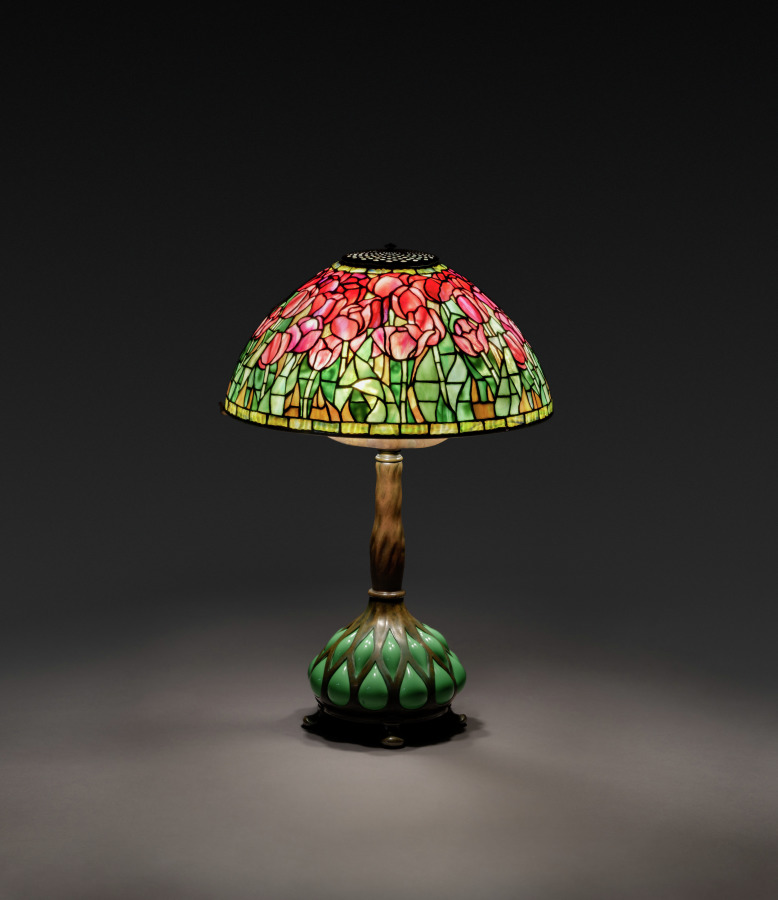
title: Tulip Table Lamp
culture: America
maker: Tiffany Glass & Decorating Company (America, New York, 1892–1902)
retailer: Tiffany Studios (United States, New York, 1902–32)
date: c. 1900–1906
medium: Leaded glass, blown glass, bronze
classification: Lamp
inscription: Shade impressed: TIFFANY STUDIOS NEW YORK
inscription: Base impressed: TGDCo/TIFFANY STUDIOS/NEW YORK/21667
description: In the 1870s a renewed emphasis on natural landscapes ushered in a generation of cottage gardeners who delighted in planting perennials in large quantities. Louis Comfort Tiffany was among those who championed the lush, sometimes wild-looking displays of varied floral species in the garden at his Long Island estate, Laurelton Hall. Tiffany encouraged his designers to take inspiration from his garden by shipping fresh cuttings almost weekly to his studios. Ohio native Clara Wolcott Driscoll and her team of female designers created floral patterns for lamps and mosaics based on the colorful blooms of spring that became among the most sought after and commercially successful of Tiffany’s production.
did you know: Many of Louis Comfort Tiffany's lamp shades such as this tulip version were designed in standard sizes so that they could be used on different bases.